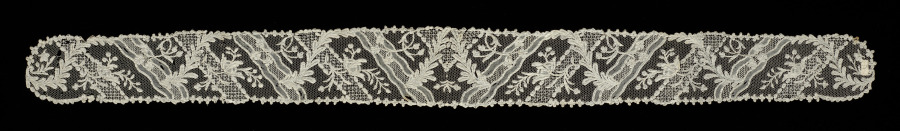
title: Lace Lappet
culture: France, Argentan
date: 1715–74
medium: Linen: needle lace (Point de Argentan)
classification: Lace